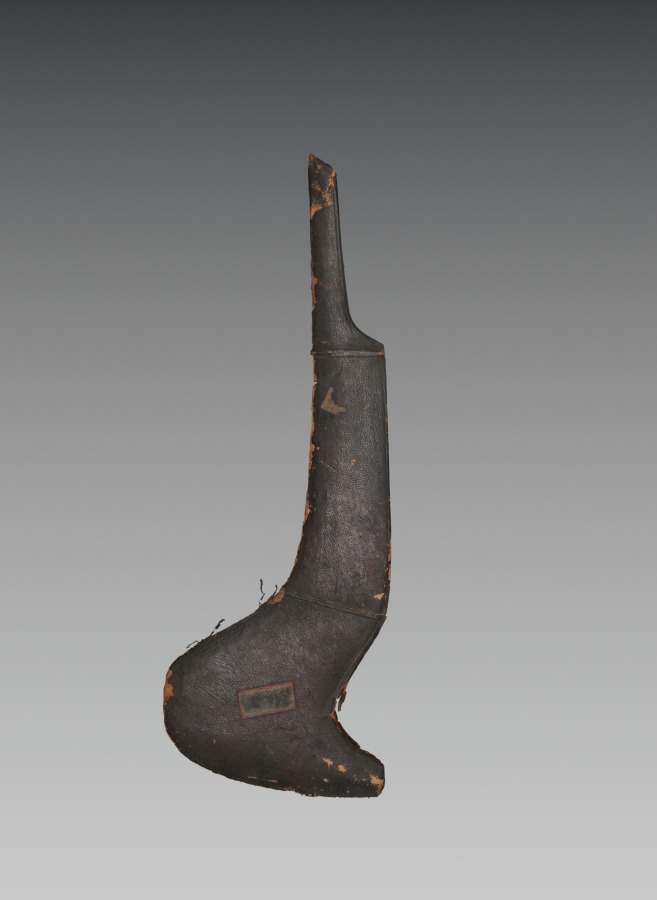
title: Scabbard for Knife or Axe (Kharga)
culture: Nepal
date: 1800s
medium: iron with wooden handle and leather scabbard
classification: Arms and Armor